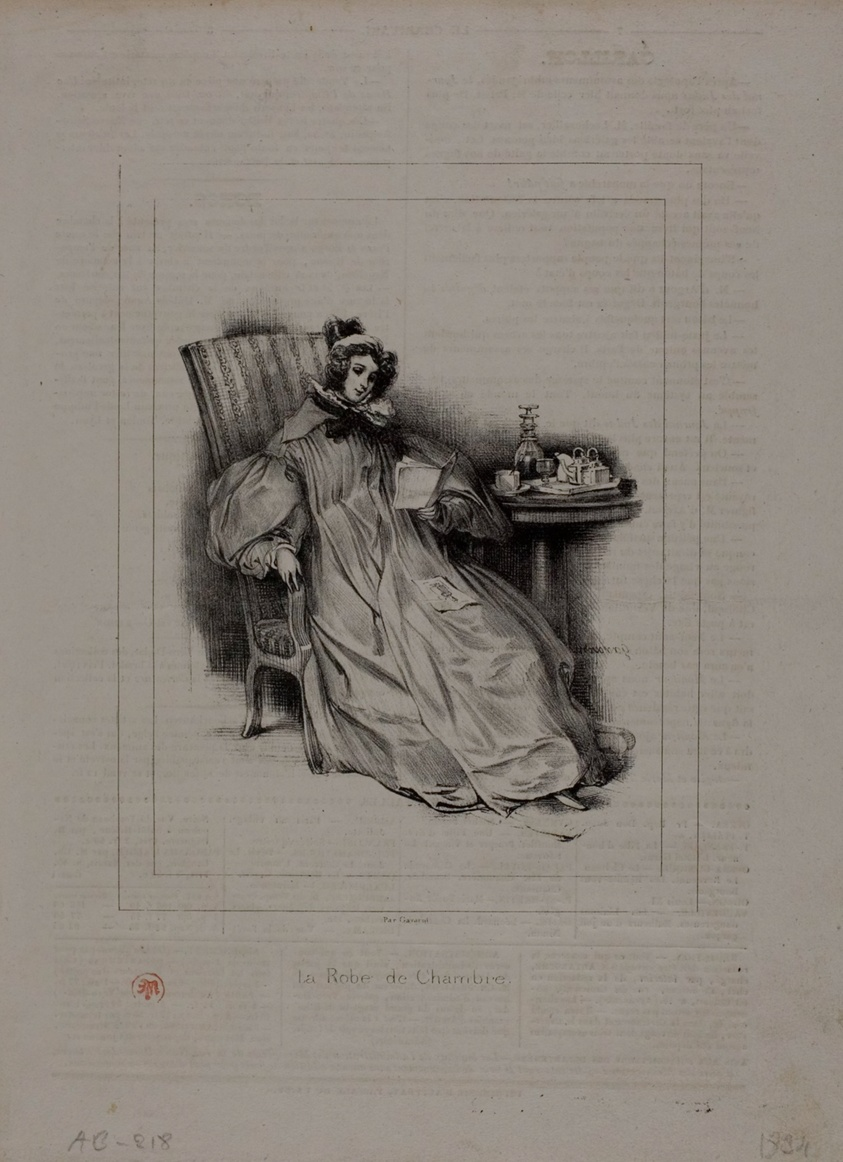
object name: Print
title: The Dressing Gown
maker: Paul Gavarni (French, 1804-1866)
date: 1834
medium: Lithograph in black on ivory wove paper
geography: France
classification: lithograph; print; prints and drawing